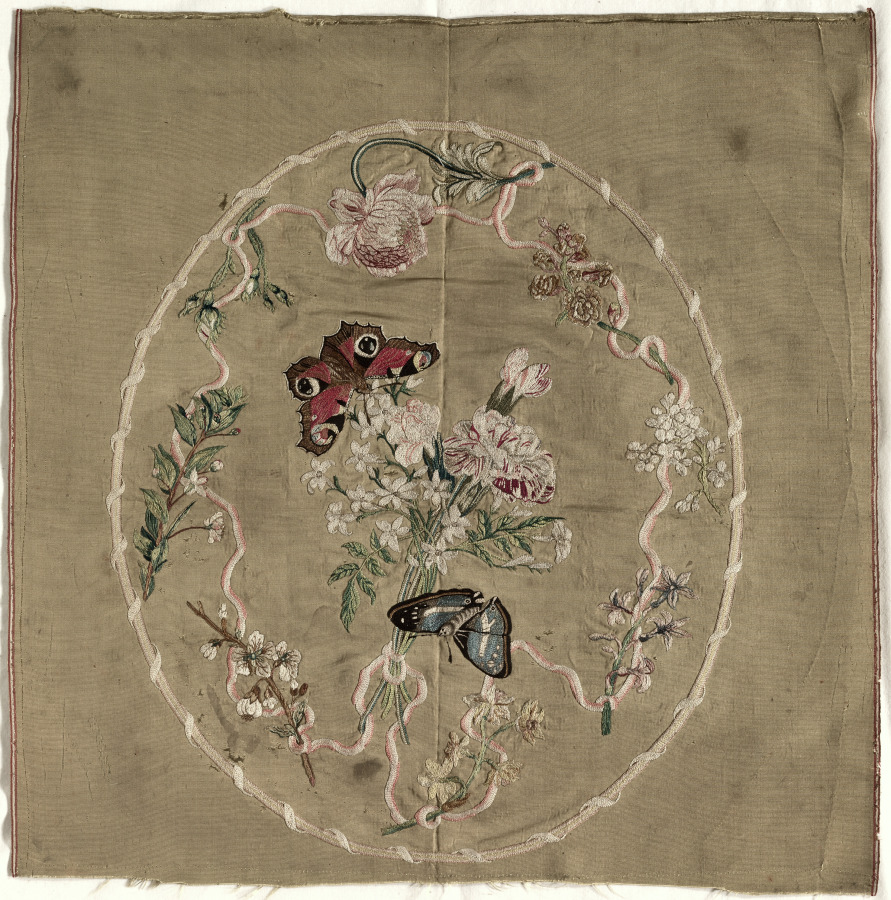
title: Embroidery for Fire Screen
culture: England, early 19th century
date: early 1800s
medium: embroidery, silk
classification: Embroidery